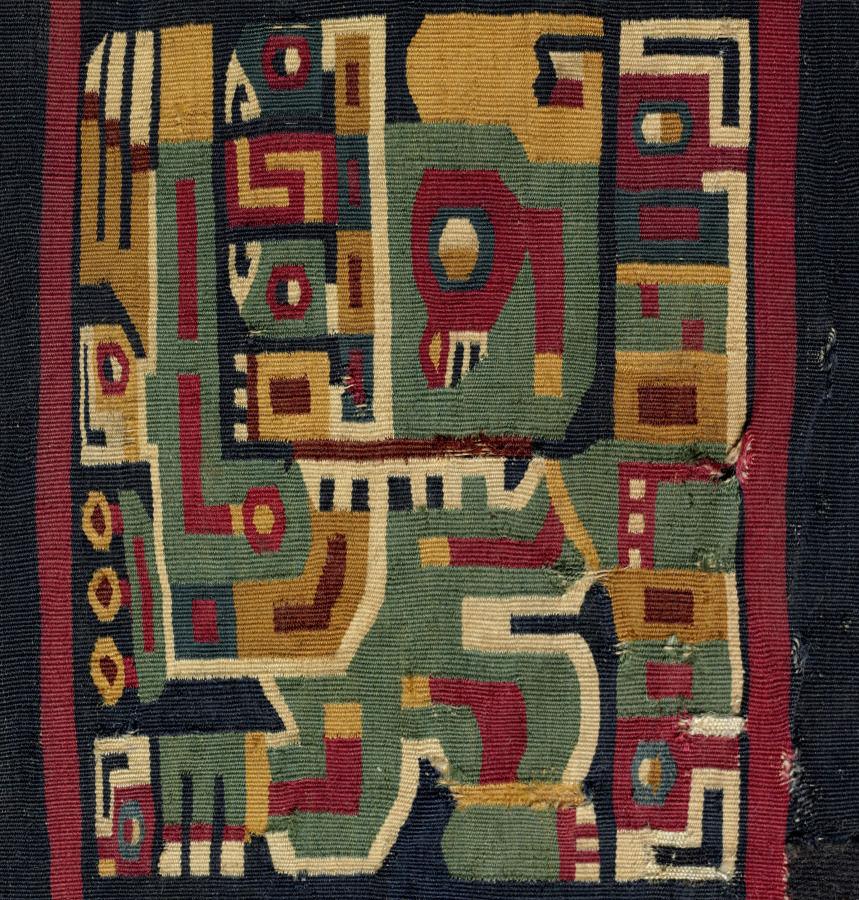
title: Tunic Fragments with Bird-Headed Creature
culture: Central Andes, Middle Horizon, Wari, 6th-11th century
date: 600–1000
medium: Camelid fiber, cotton; tapestry weave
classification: Textile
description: The bird-headed creature in profile that repeats in each of this tunic's design fields gazes upward, holds a staff of authority in front of its body, and wears an ornate headdress behind which a three-feathered wing can be seen. The extremely high technical quality of such tunics suggests that the Wari reserved bird imagery for their most exalted rulers. Here, the original incorporated more than twice as much yarn as the routine--some 19 miles, all handmade and much dyed an inky, dark blue, the most prestigious of Wari colors.